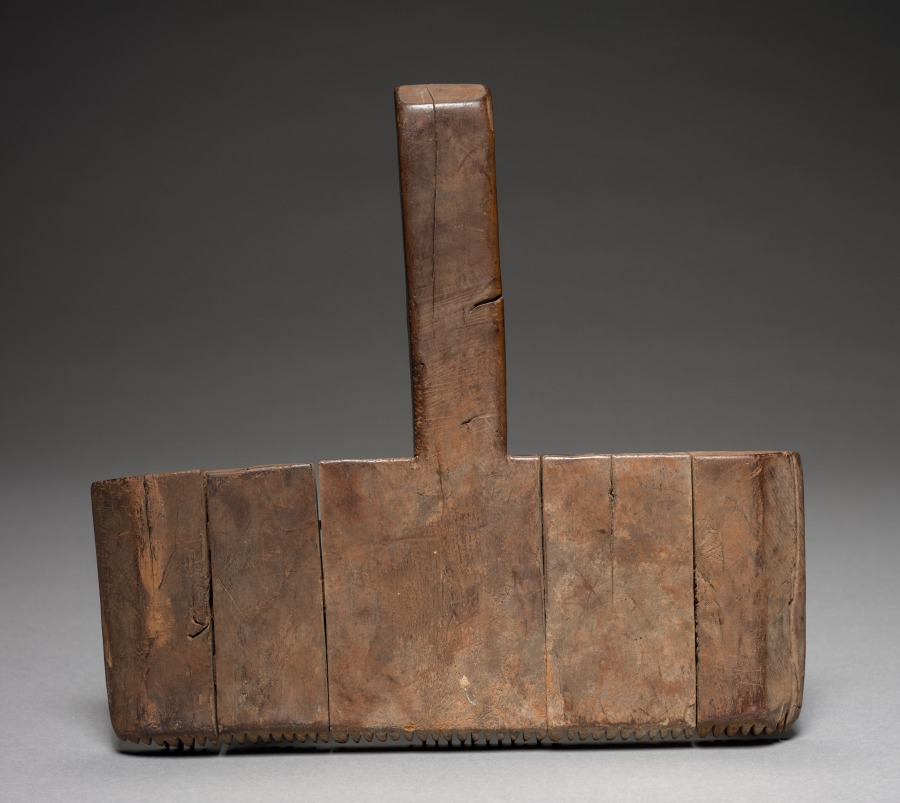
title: Carding Tool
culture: Egypt, Greco-Roman period (332 BCE–395 CE), Ptolemaic dynasty (305–30 BCE) or later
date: 305 BCE or later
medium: wood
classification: Wood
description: Carding was the process of removing tangles from and aligning the fibers of wool in preparation for spinning.